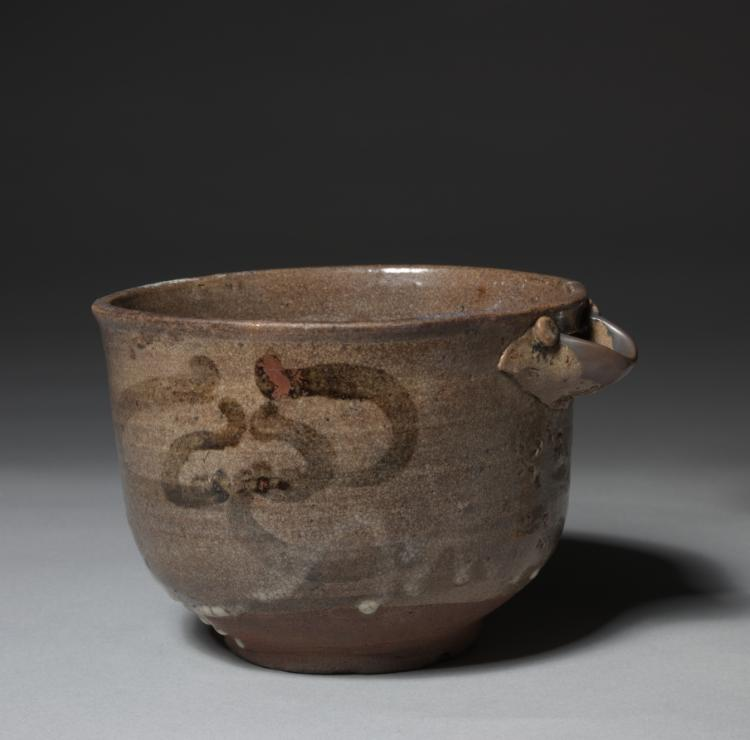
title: Spouted Bowl with Flower Design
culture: Japan, Momoyama period (1573–1615)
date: late 1500s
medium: glazed stoneware with slip decoration (Karatsu ware)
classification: Ceramic